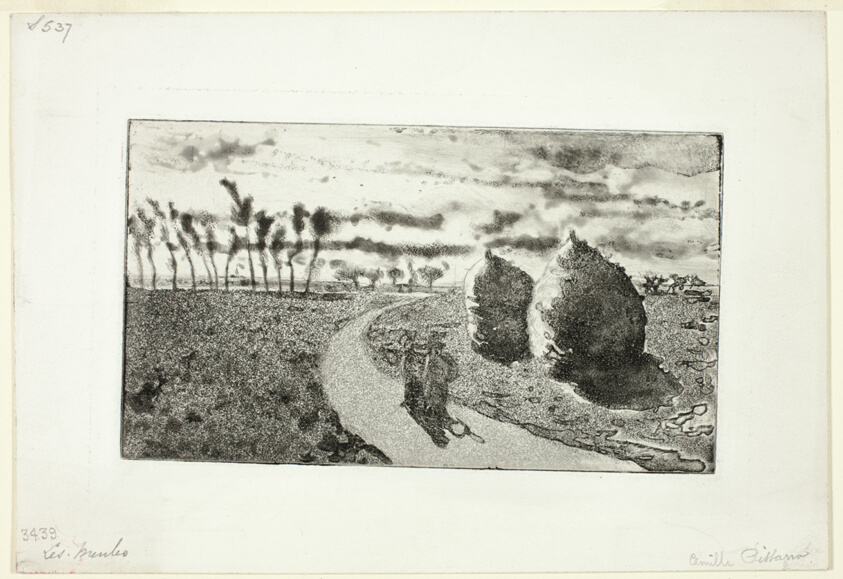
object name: Print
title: Twilight with Haystacks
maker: Camille Pissarro (French, 1830-1903)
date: 1879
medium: Aquatint, with etching, in black on white wove paper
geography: France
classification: aquatint; print; prints and drawing